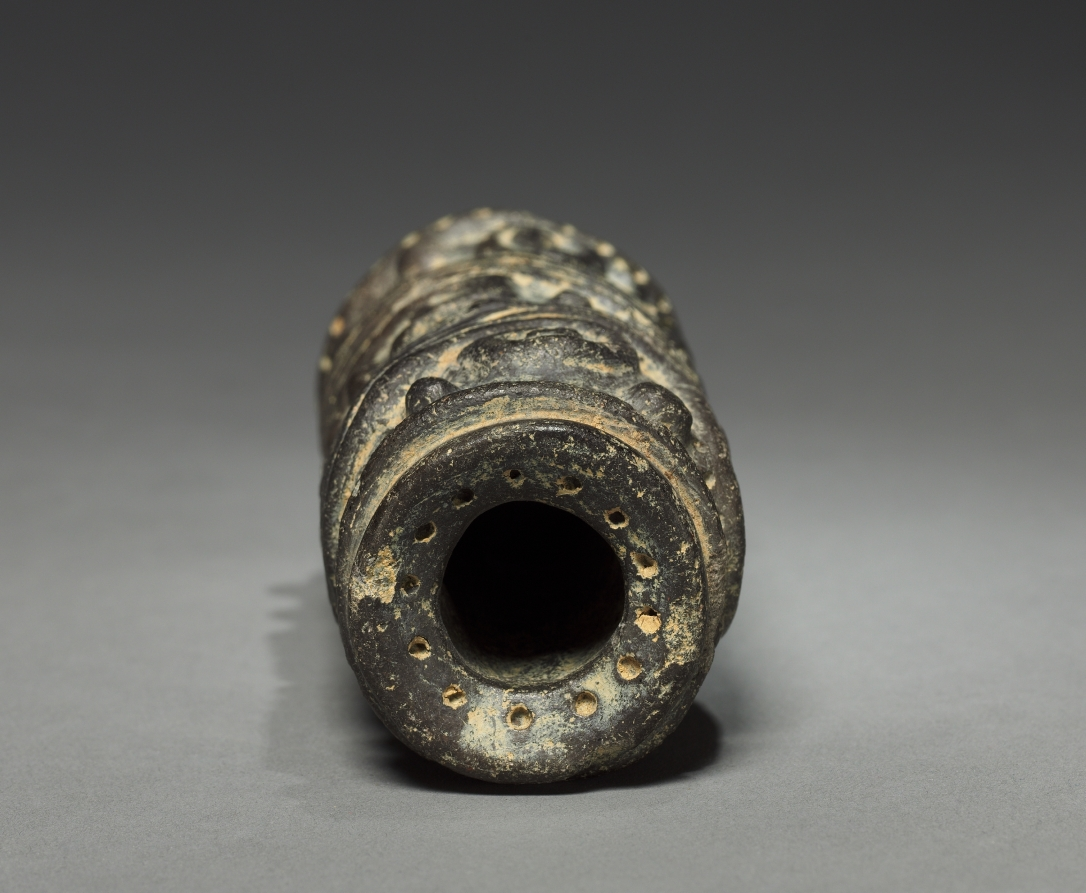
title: Roller Stamp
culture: Colombia, 19th-20th century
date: before 1921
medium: black ware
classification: Ceramic